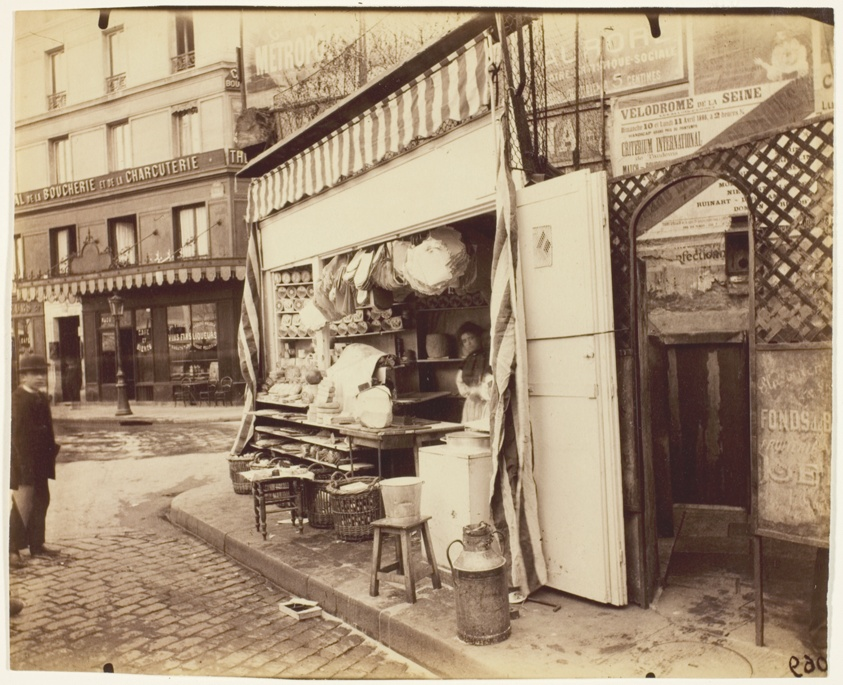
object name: Photograph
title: Untitled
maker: Jean-Eugène-Auguste Atget (French, 1857–1927)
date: 1898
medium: Albumen print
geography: France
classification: albumen silver print; photographic process; photography; photograph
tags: cityscapes